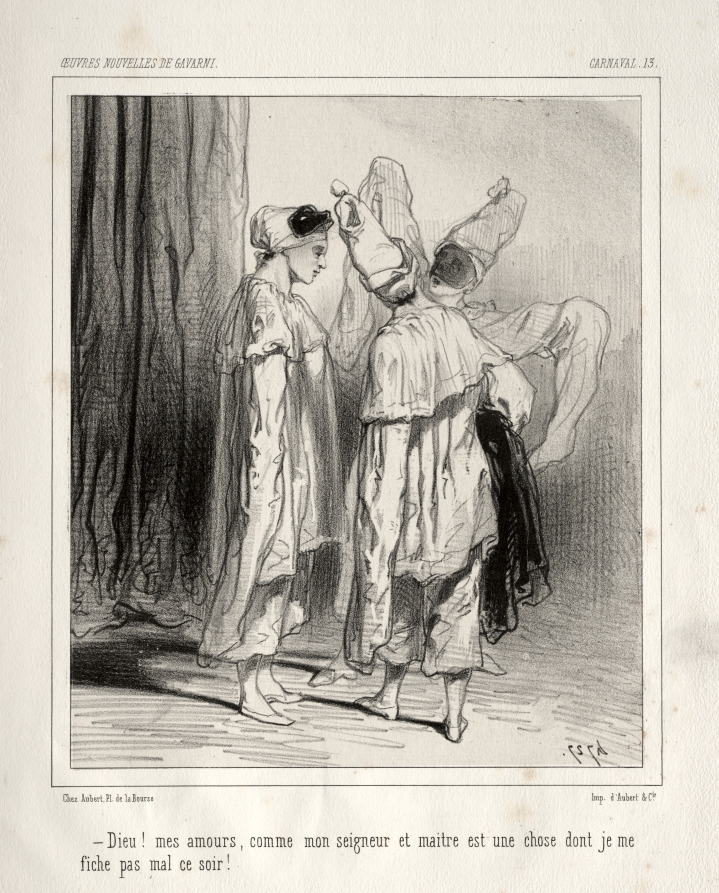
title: Carnaval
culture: France, 19th century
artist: Paul Gavarni (French, 1804–1866)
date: c. 1841–47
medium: lithograph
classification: Print